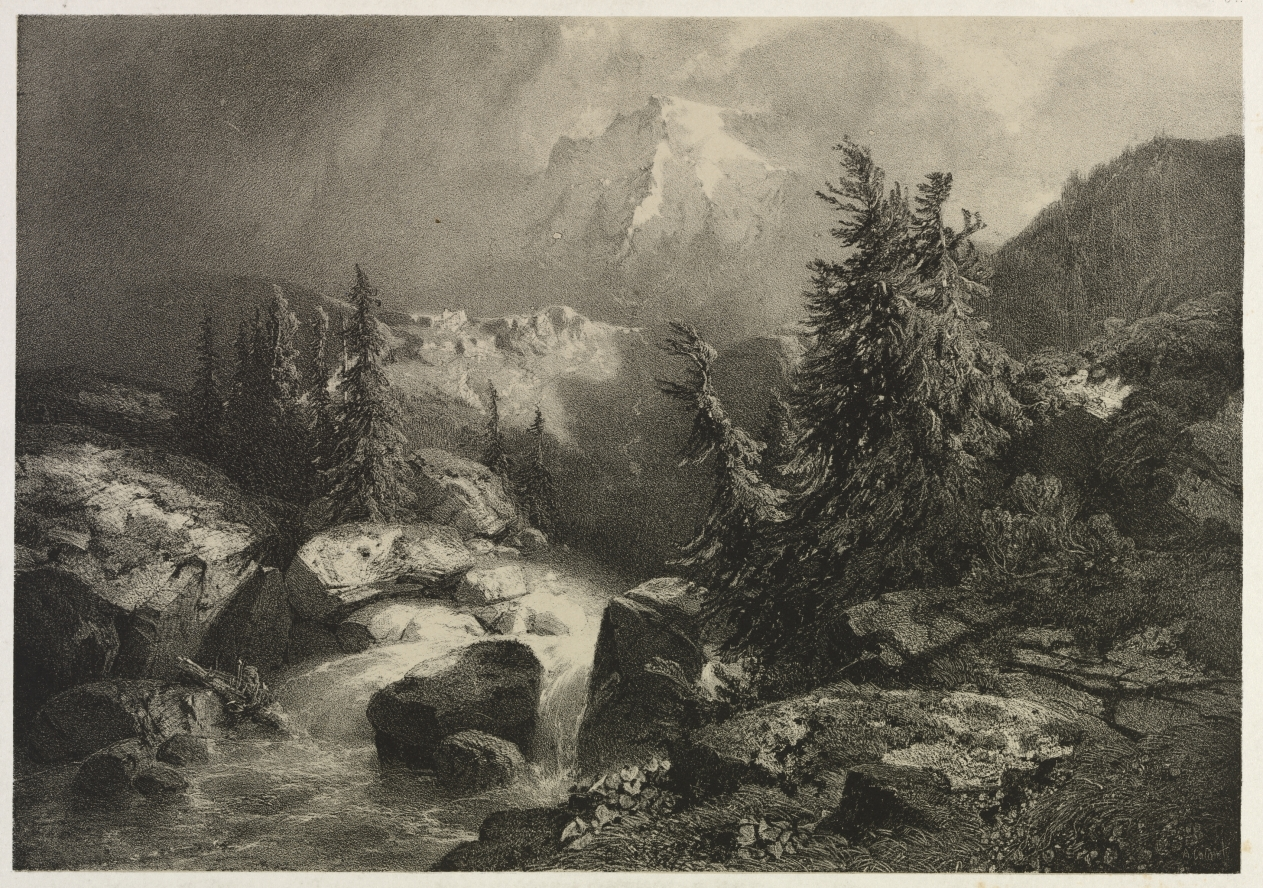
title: Storm in the Alps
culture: Switzerland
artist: Alexandre Calame (Swiss, 1810–1864)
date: mid-1800s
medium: lithograph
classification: Print